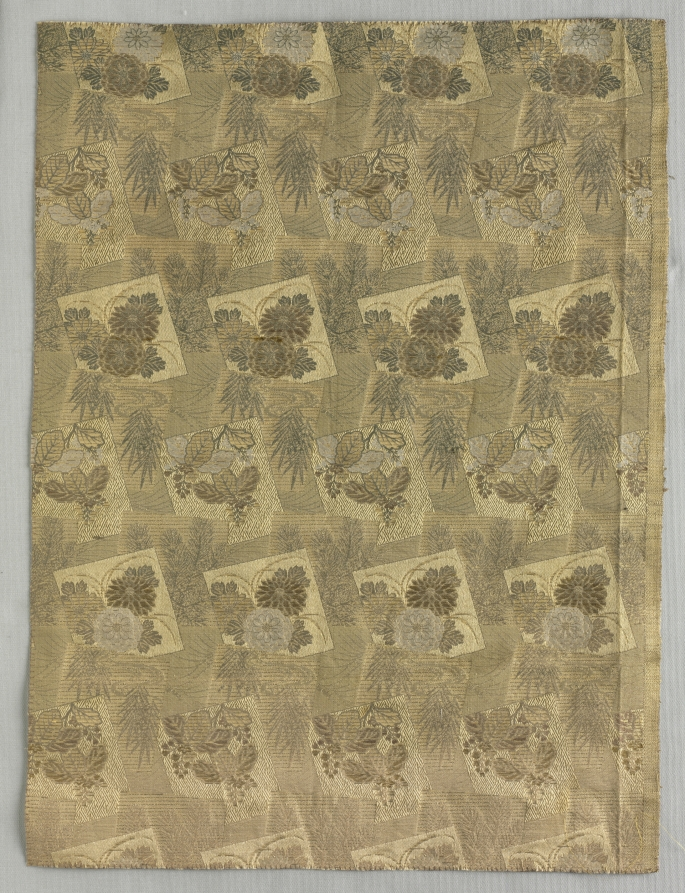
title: Textile Fragment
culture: Japan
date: late 1800s-early 1900s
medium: silk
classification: Textile